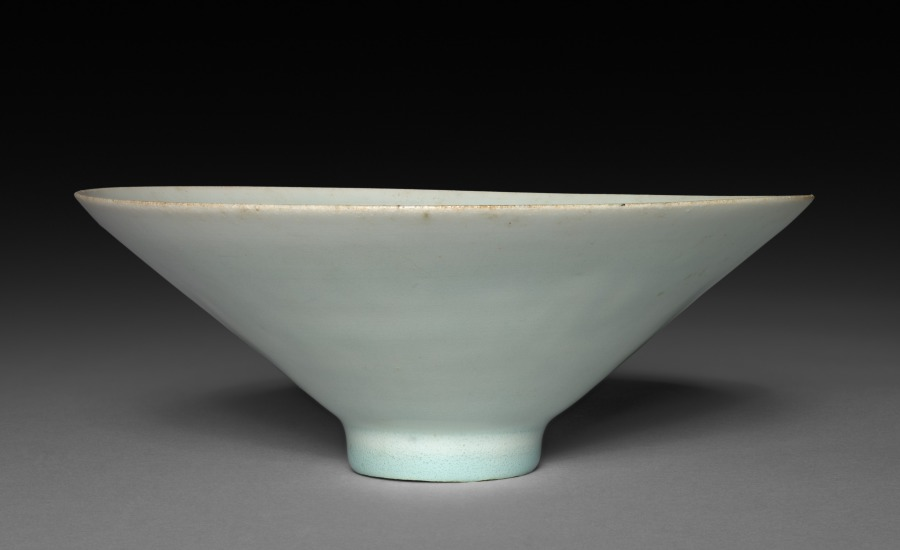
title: Conical Bowl with Floral Scroll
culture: China, Jiangxi Province, Jingdezhen kilns, Southern Song dynasty (1127–1279)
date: 1100s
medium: Glazed porcelain with incised decoration, qingbai ("blue-white") ware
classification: Ceramic